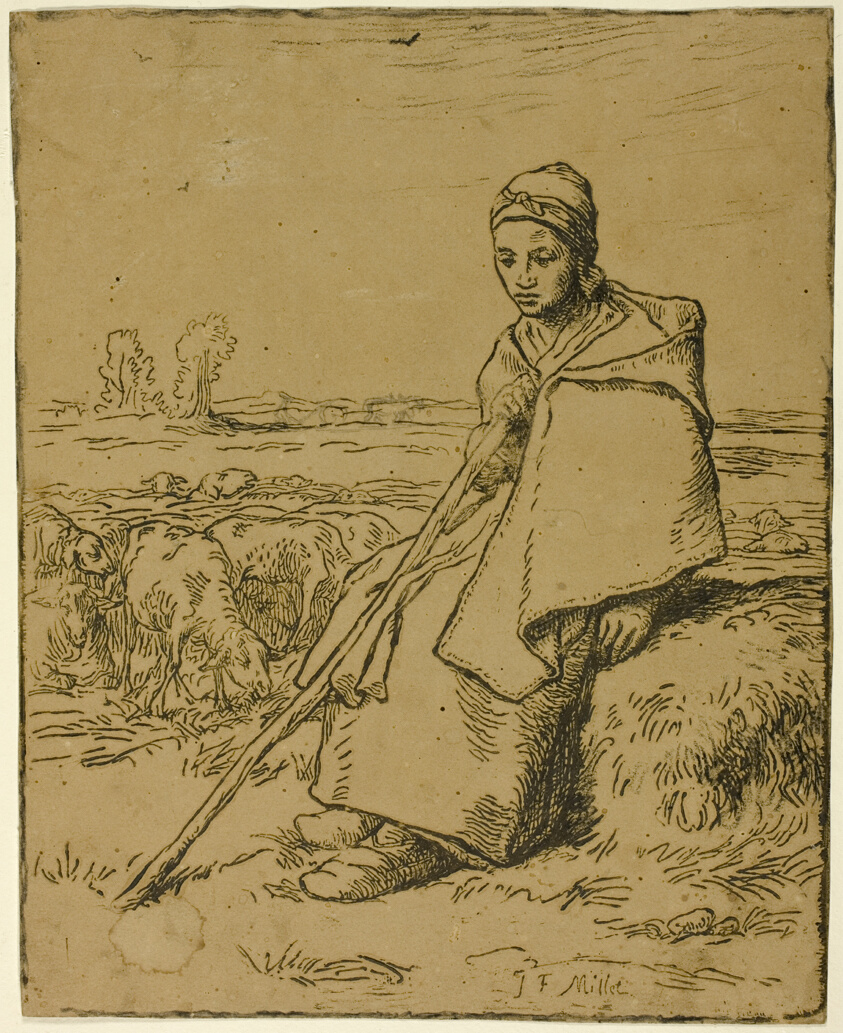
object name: Print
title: The Shepherdess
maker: Jean François Millet (French, 1814-1875); printed by Jean-Baptiste Millet (French, 1831-1906)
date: 1863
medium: Woodcut with graphite additions on tan wove paper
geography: France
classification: woodcut; print; prints and drawing